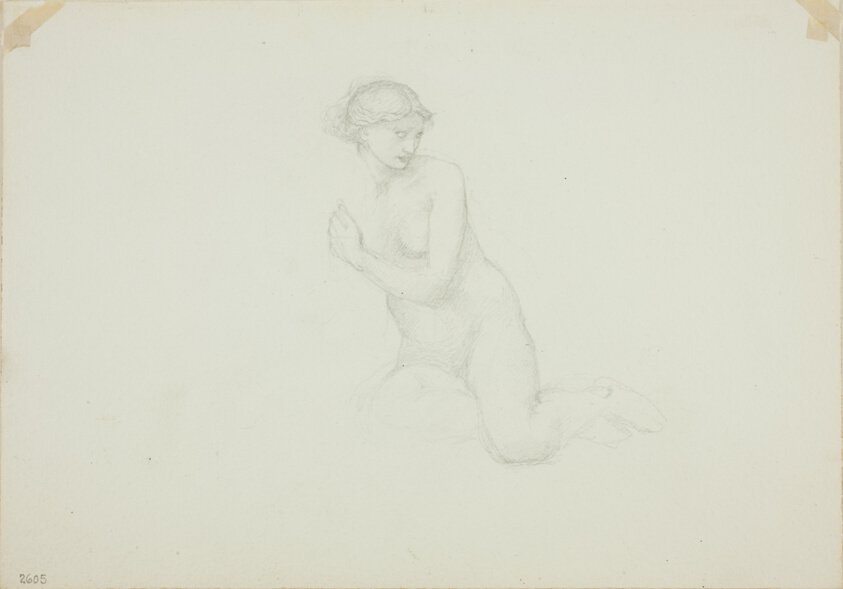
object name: Drawing and Watercolor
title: Seated Female Nude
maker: Sir Edward Burne-Jones (English, 1833-1898)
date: c. 1873–77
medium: Graphite on ivory wove paper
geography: England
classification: graphite; drawings (visual works); prints and drawing